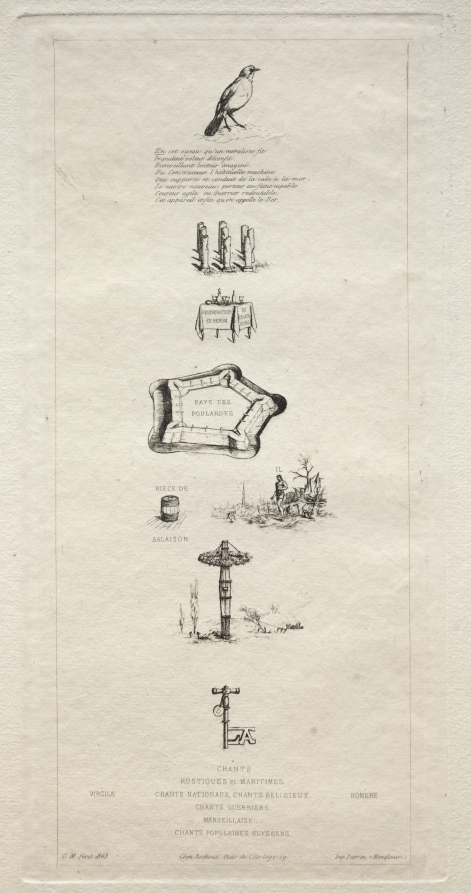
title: Rebus: "Beranger was not really strong for he never had the key to the fields"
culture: France, 19th century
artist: Charles Meryon (French, 1821–1868)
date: 1863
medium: etching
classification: Print